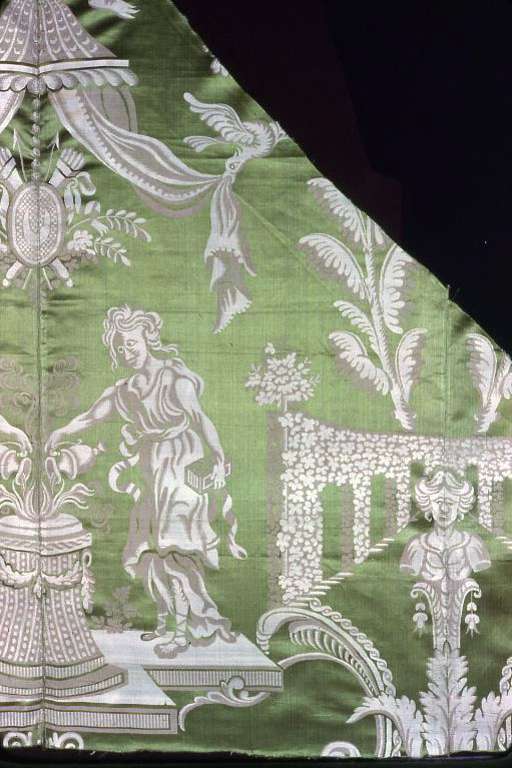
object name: Textile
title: Panel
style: directoire, european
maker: France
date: Directoire period, 1795/99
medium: Silk, warp-float faced satin weave, with areas of twill and plain weave, weft floats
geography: France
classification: textile; weaving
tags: women, coat of arms, swags, royalty